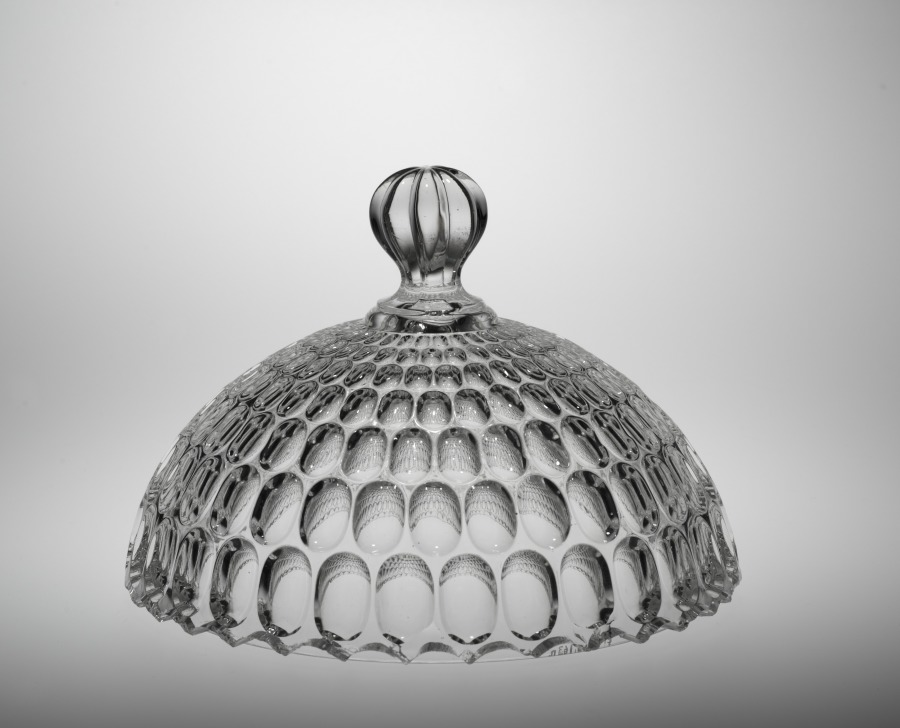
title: Cover for an Argus Compote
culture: America, Pennsylvania, Pittsburgh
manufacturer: Bakewell, Pears and Company (American)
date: c. 1865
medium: glass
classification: Glass